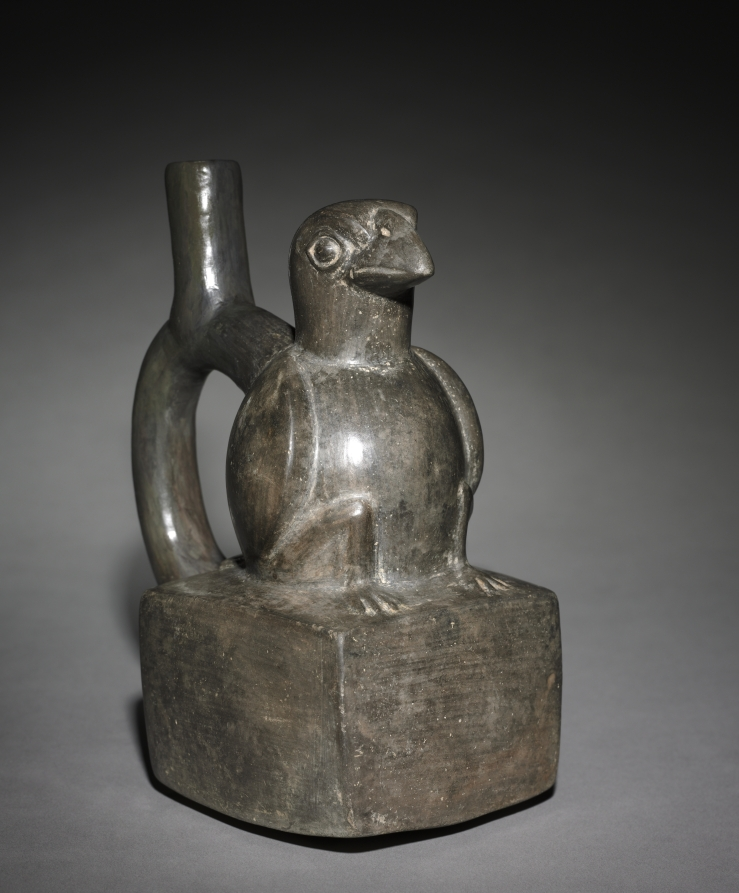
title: Darkware Vessel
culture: Peru, North Coast, Chimú style (900-1470)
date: 900–1470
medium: black ware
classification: Ceramic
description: Under the Chimú, ceramic seems to have been a less important artistic medium than for earlier north coast cultures. Accordingly, ceramics were mass produced with molds and, rather than bearing painted scenes, often have an overall dark surface achieved by firing in a smoky atmosphere.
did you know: Chimú potters fired their vessels in a reduced-oxygen atmosphere to achieve a uniform black surface.